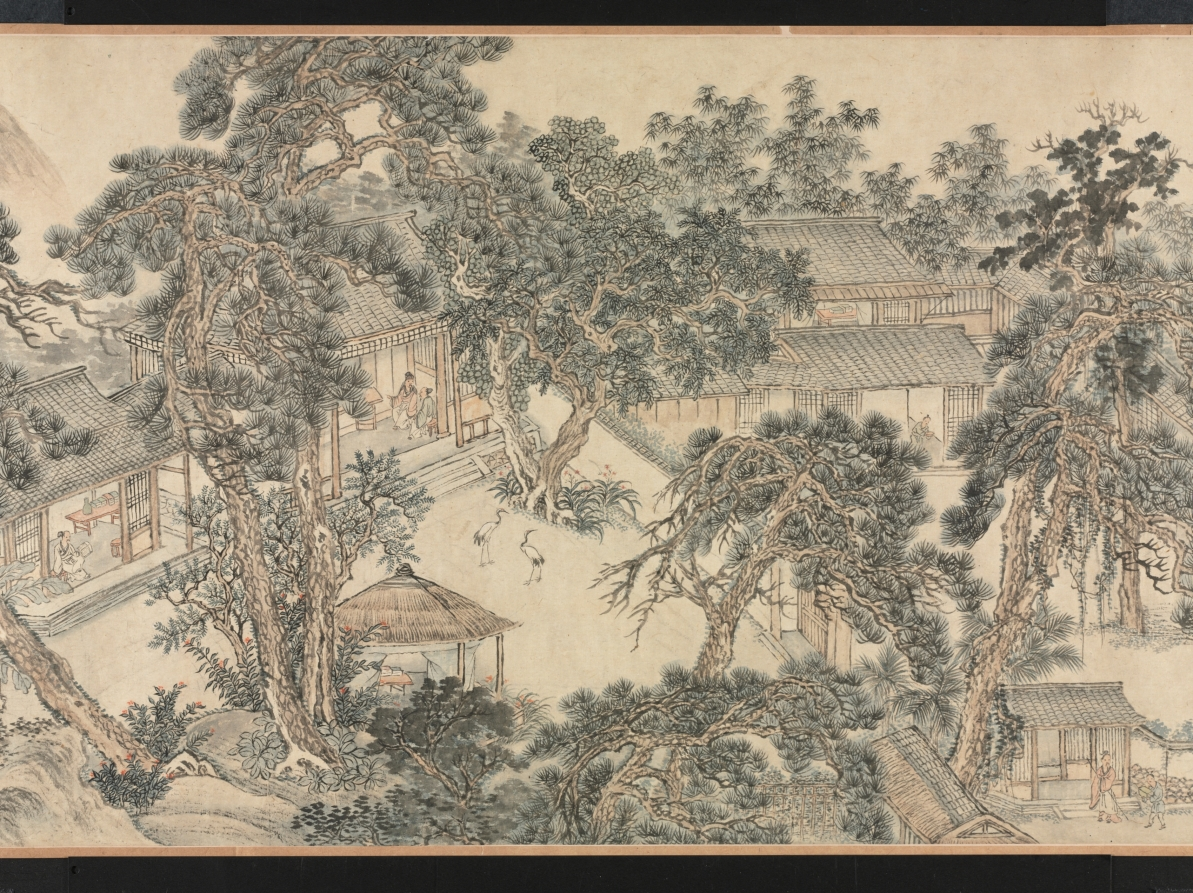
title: Hall of Lofty Pines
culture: China, Qing dynasty (1644-1911)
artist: Wang Hui (Chinese, 1632–1717)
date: 1703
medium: handscroll; ink and color on paper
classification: Painting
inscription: [題] 松喬堂圖 康熙癸未夏六月, 海虞耕煙散人王翬畫。[印]王翬之印; 石谷. [左下] 來青閣; 耕煙野老時年七十有二.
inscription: 松喬堂圖一卷，海虞石谷王君為靜海近公厲少司冦公作也。圖成于癸未之夏。未幾而公遂仙去。公令子今編修君南湖屬余題跋其後。余與公同官侍從，交契最深。側見公之清修純德，蔚為聖天子所眷重。侍直內廷，密勿贊襄，幾二十餘年。蒼生之所以受賜，士林之所以沐德者，天下莫能窺，在廷莫能悉。而公卒不言。以故宸衷日益契，恩禮亦日益渥。雖年逾懸車，時有歸老之念。而上固不聼公之去。其所謂松喬堂者，御書以賜公者也。蓋以松比公之清風勁節，而歲寒不改，經霜彌茂。則又以期公之壽考未有艾焉。公知此身未易乞，而山林槃磵之樂，止可寄諸寤思。此松喬堂圖之所由作也歟。石谷此圖，結構精密，筆墨超邁。其寫樹木之蒼蔚，堂宇之靚幽。恍見摩詰輞川樂天廬山之勝。獨惜公未得一日徜徉故園以償其願。即繪於圖亦未得以永其趣，此編修君之所以眷眷不忘也。雖然千歳之松喬，下蔭百畝，上以修棟梁之需。然則上當日名堂之意，不更望於後之人襲其芘而養其材也哉。吾願編修君之寶斯圖。并望君之塗塈丹雘，大其堂構也已矣。 康熈丙戍重陽三日，雲間王鴻緒跋。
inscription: 10 additional seals: 1 seal of Li Duna 勵杜納 (1628–1703); 4 seals of Zha Ying 查瑩 (jinshi of 1766); 5 seals of Li Yun (dates unknown).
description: Wang Hui 王翬, a leading painter in the orthodox school of the early Qing dynasty (1644–1911), was commissioned to paint this landscape with a country estate for Li Duna 勵杜納 (1628–1703), vice minister of justice in Emperor Kangxi’s court. The emperor had honored Li by granting him a piece of calligraphy with the name of Li’s retirement retreat, “Hall of Lofty Pines.” He drew a comparison between pines and Li’s upright character, resilience, and longevity. Wang Hui’s painting was supposed to allow Li to imagine living in a beautiful, secluded compound among the hills and pines. Sadly, Li died before seeing the completed painting and before receiving the emperor’s permission to retire. The landscape begins with peaceful riverbanks and low hills. The pines around the estate in the middle of the handscroll are truly lofty, some stretching even beyond the frame of the painting. Li Duna, the estate’s owner, is shown twice in his serene mountain retreat: first approaching the entrance to the compound with two servants at the right, and then later in the scroll, to the left, reading in the comfort of an inner room.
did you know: One servant carries the estate owner's carefully wrapped qin, a type of zither.